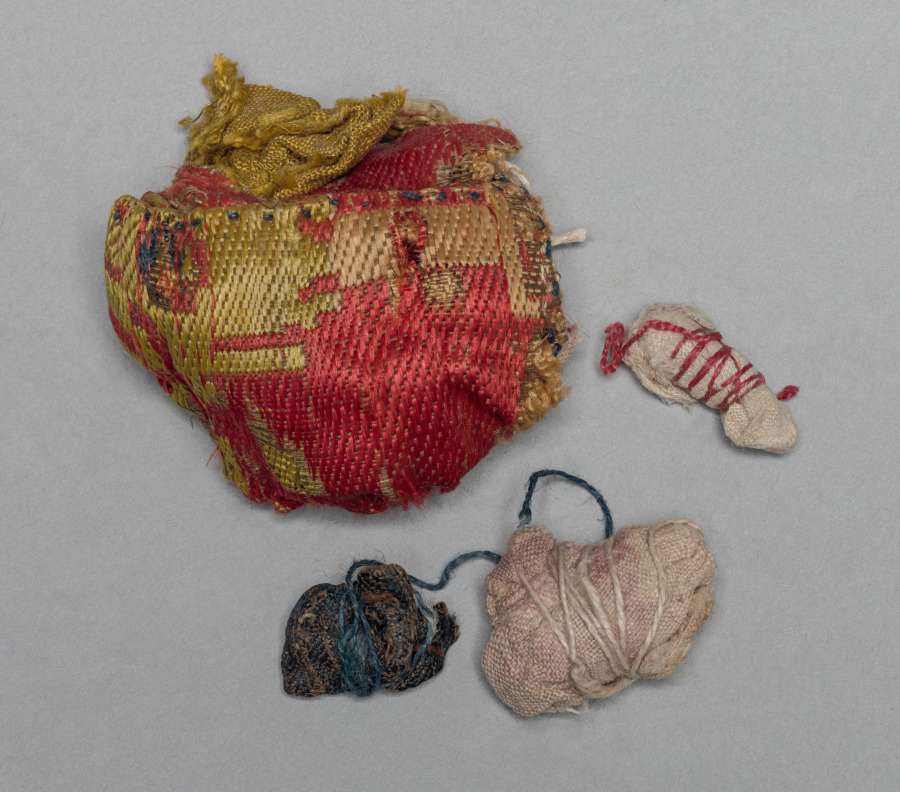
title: Relic Bundle with Saints Stephen, Sophie, Perpetua, Paul, Barnaba, Philip, Simon, Thaddeus, John the Apostle, and James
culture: Germany, Lower Saxony?, Romanesque period, 11th century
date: c. 1045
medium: Compound weave or samite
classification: Metalwork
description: These relics are housed in the portable altar commissioned by Countess Gertrude of Brunswick, one of the Guelph Treasure’s earliest and most sumptuous objects.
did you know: An x-ray revealed only small specks of solid material among this wrapped bundle.